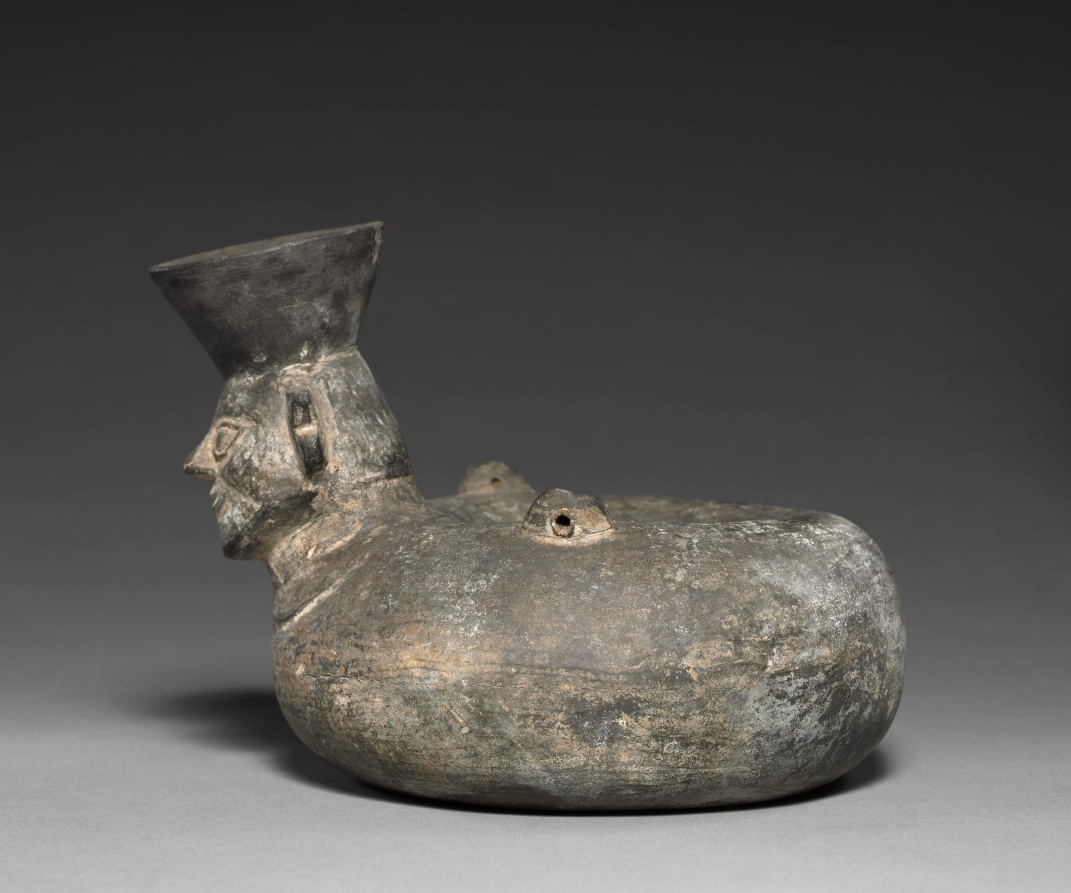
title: Funeral Urn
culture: Peru, Chimú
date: c. 1150–1530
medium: black ware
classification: Ceramic